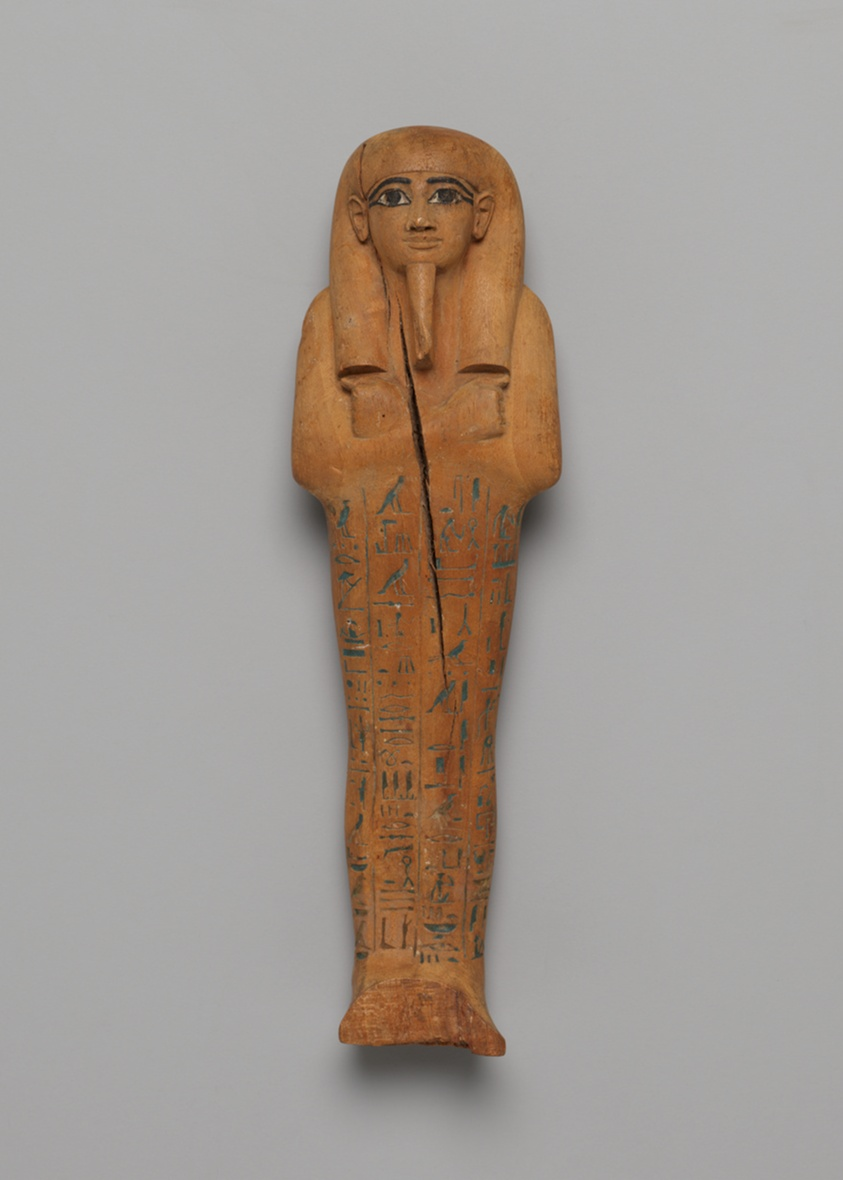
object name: Funerary Object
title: Shabti (Funerary Figurine) of Nebseni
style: new kingdom, eighteenth dynasty, ancient, egyptian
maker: Egyptian; Thebes (modern Luxor), Egypt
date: New Kingdom, early Dynasty 18, about 1570 BCE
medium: Wood (tamarisk) and pigment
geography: Egypt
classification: ushabti; wood; figurine; funerary; ancient art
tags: mummies, Hieroglyphs, figurines, writing